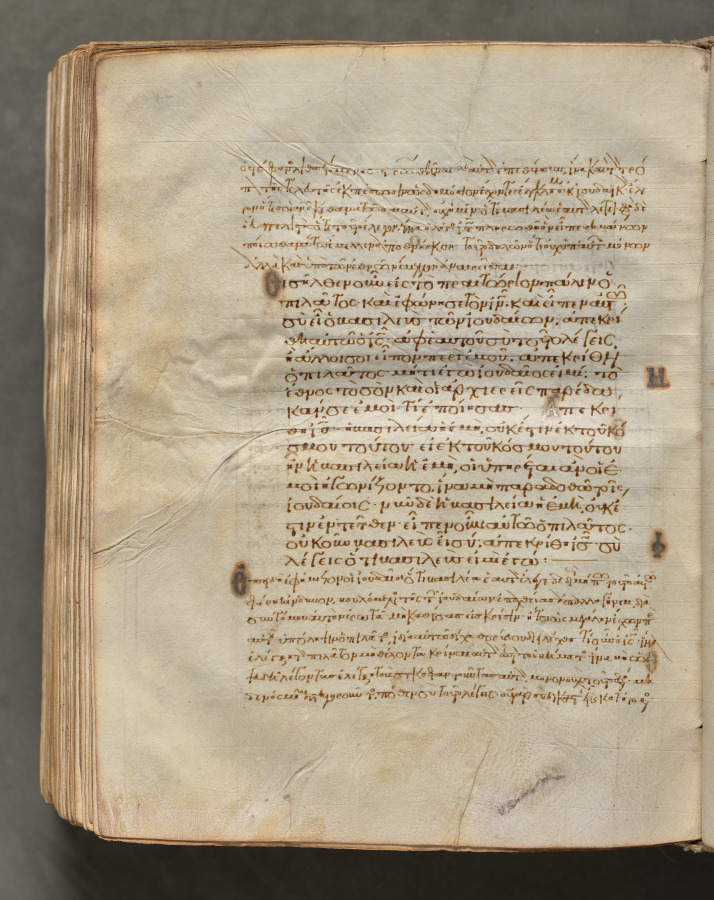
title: Text, folio 410 (verso), from a Gospel Book with Commentaries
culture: Byzantium, Constantinople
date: c. 1000–1100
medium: ink, tempera, and gold on vellum; leather binding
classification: Bound Volume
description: Each of the four gospels in this book opens on a page with brilliantly illuminated borders depicting the author of the text as well as birds—principally peacocks, symbols of the immortality of the soul—and fountains, representing the fountain of life and the salvation of the soul. This volume consists of 428 leaves with texts in Greek. Its level of sophistication suggests that it was probably written and decorated in a monastery in Constantinople.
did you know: Gospel books were carried in procession through Byzantine churches.